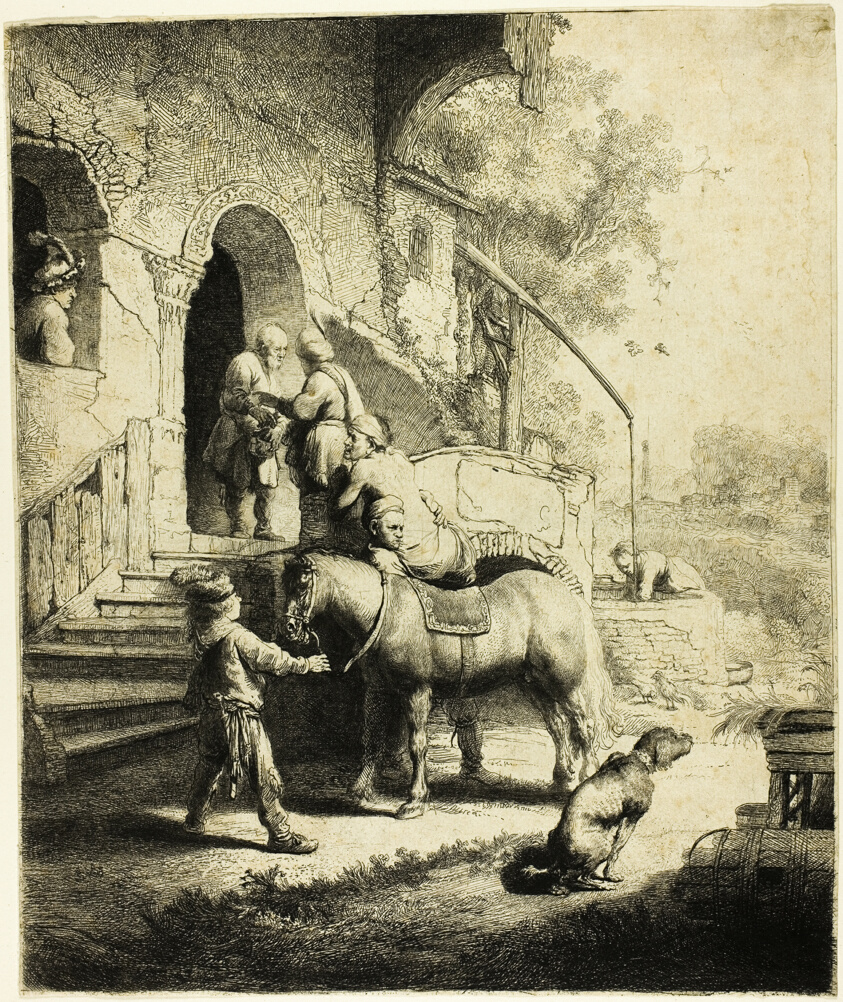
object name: Print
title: The Good Samaritan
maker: Rembrandt van Rijn (Dutch, 1606-1669)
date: 1633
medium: Etching and burin on ivory laid paper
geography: Holland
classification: etching; print; prints and drawing; paper; burin